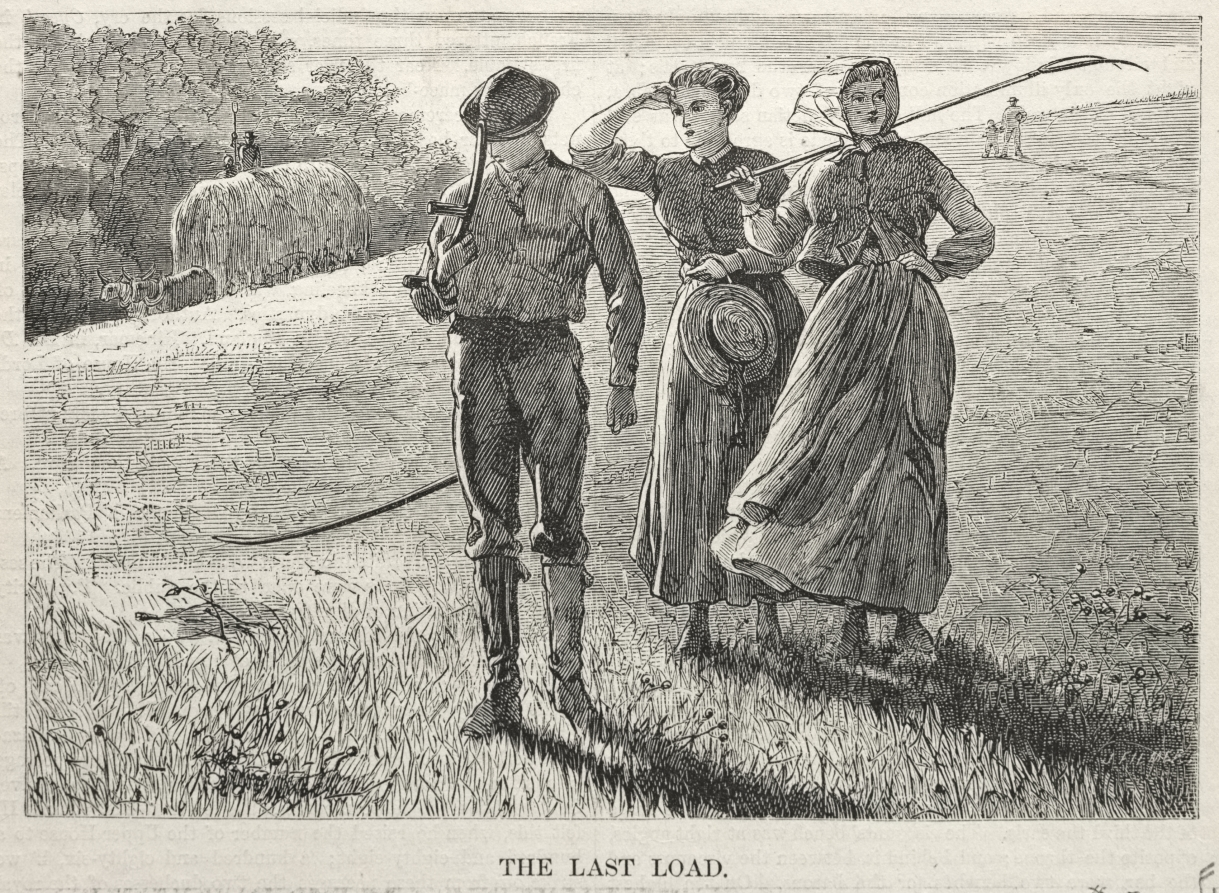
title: The Last Load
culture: America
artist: Winslow Homer (American, 1836–1910)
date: 1869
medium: wood engraving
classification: Print